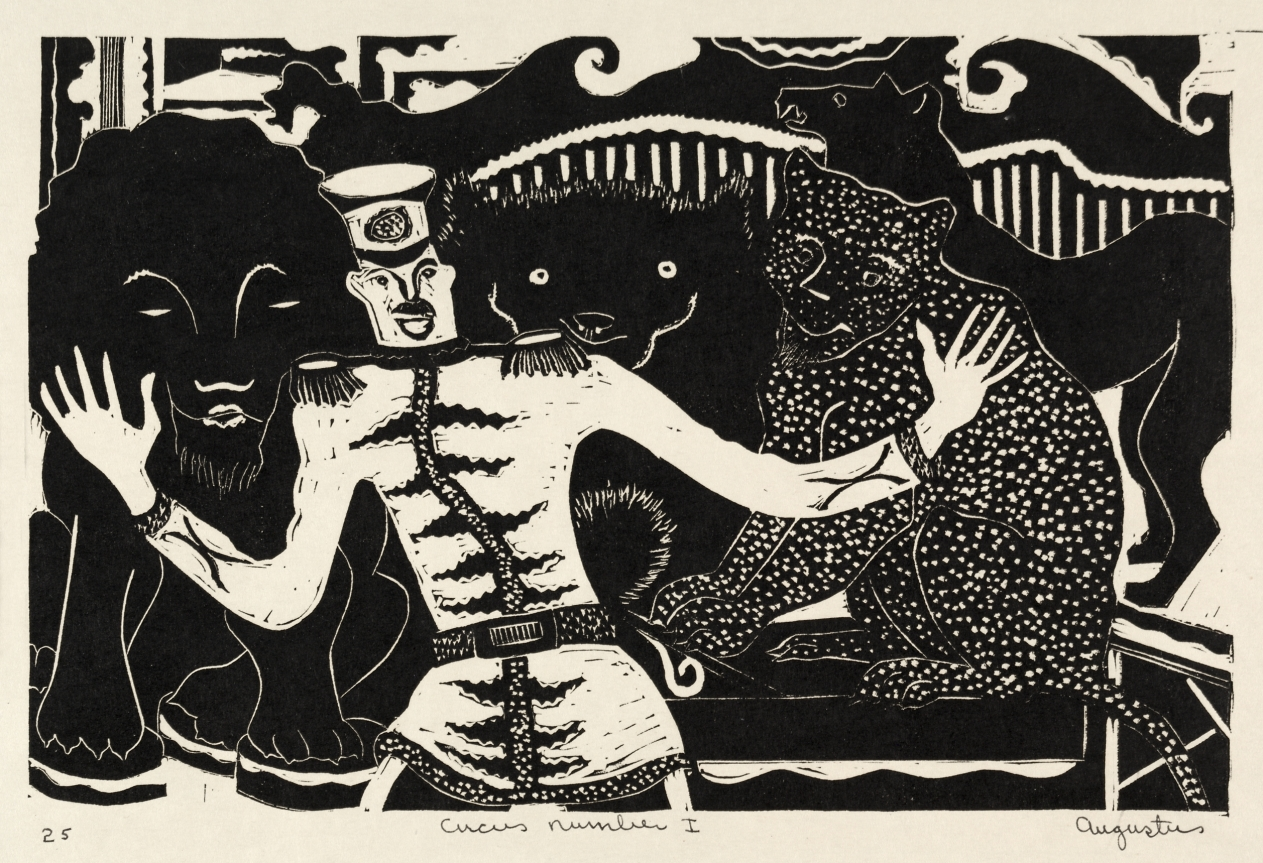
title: Circus, No. 1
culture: America, Ohio, Cleveland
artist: Augustus Peck (American, 1906–1975)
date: 1920–30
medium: linoleum cut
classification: Print